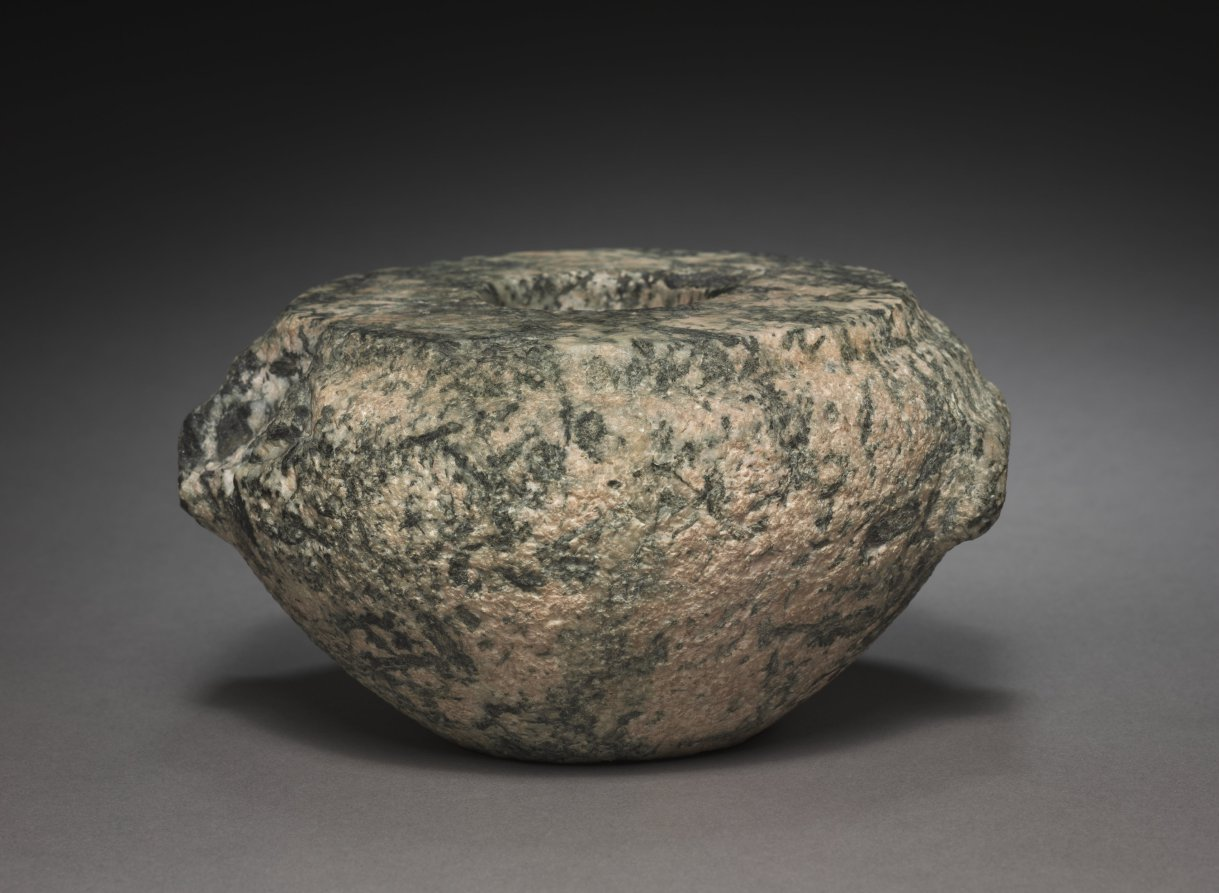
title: Squat Dummy Jar with Lug Handles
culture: Egypt, probably Saqqara, north of the Step Pyramid, tomb 2347, excavations of J. E. Quibell, 1910-1911, Early Dynastic (2950–2647 BCE), Dynasties 2–3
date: 2700–2573 BCE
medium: hornblende diorite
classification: Vessels